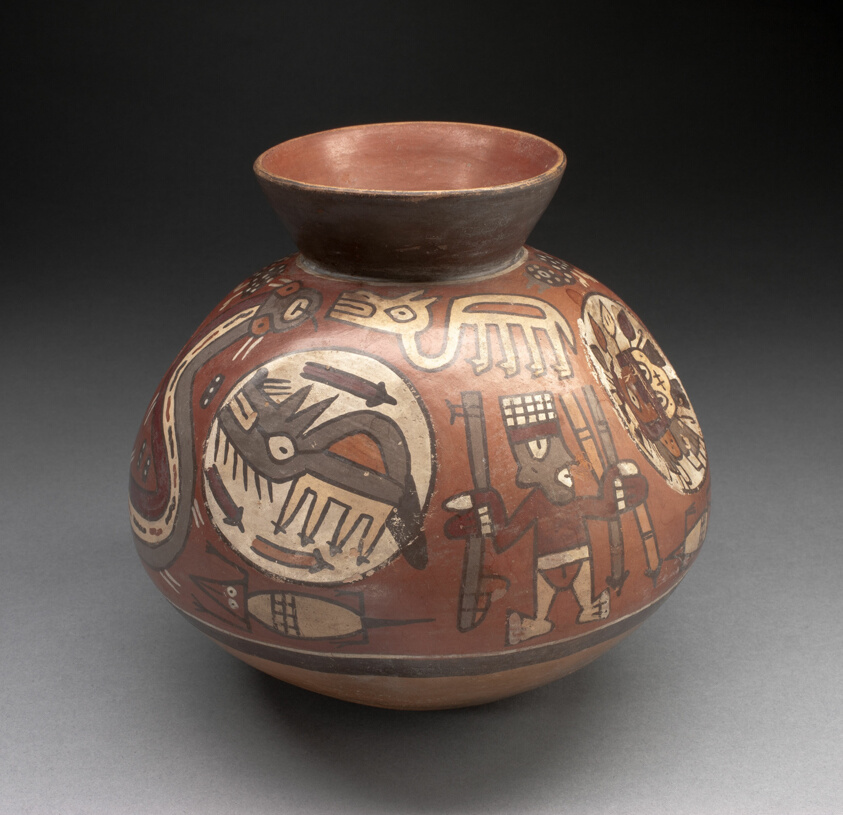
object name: Vessel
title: Jar Depicting Hunters with Coyotes, Lizards, Serpents, and Birds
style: nazca, early intermediate period, Pre-Columbian, americas, Arts of the Americas, andean, andes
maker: Nazca; South coast, Peru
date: 180 BCE–500 CE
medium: Ceramic and pigment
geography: Peru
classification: earthenware; art of the americas; ceramics; vessel